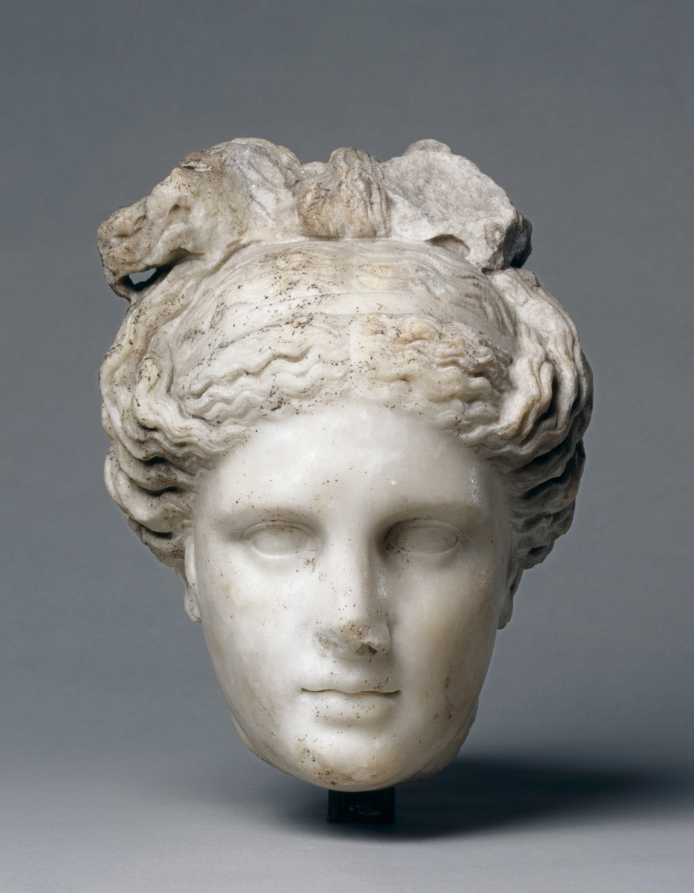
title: Head of Aphrodite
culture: Italy, Roman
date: 100–200 CE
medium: marble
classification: Sculpture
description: With idealized features including a straight nose, small mouth with thick lips, and a hairstyle best known from the so-called Capitoline Venus (now in Rome), this head likely belonged to a full-scale statue of the goddess of love. Like the Capitoline Venus and many other sculptures of the Roman period, it probably showed the goddess nude and bathing, harking back to the groundbreaking sculpture of Aphrodite at Knidos, carved by Praxiteles in the mid-fourth century BC.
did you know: The elaborate hairstyle, arranged in a bow atop the head, identifies this figure as Aphrodite.